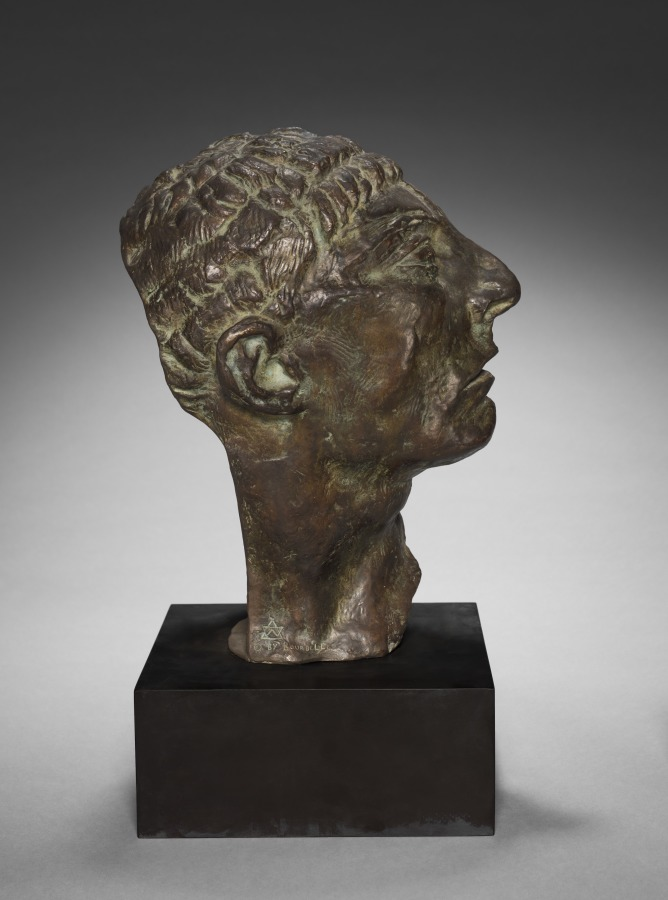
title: Mask of Hercules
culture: France, 20th century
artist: Emile Antoine Bourdelle (French, 1861–1929)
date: 1909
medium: bronze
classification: Sculpture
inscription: Inscribed at neck, lower left: "© Bourdelle"; beneath right ear: "E. Godard/Fondr Paris / 7"